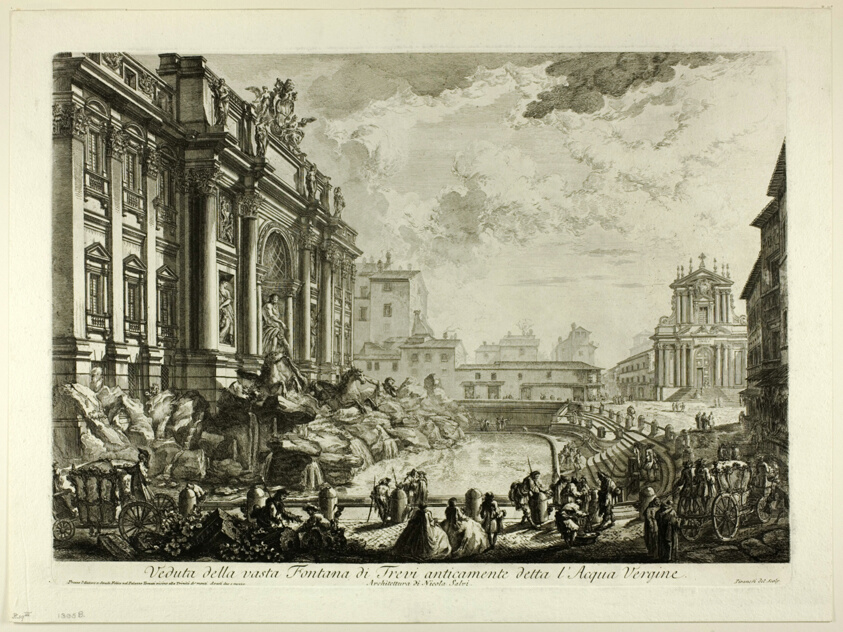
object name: Print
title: View of the large Trevi Fountain formerly called the Acqua Vergine, from Views of Rome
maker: Giovanni Battista Piranesi (Italian, 1720-1778)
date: 1750/59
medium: Etching on heavy ivory laid paper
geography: Italy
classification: etching; print; prints and drawing